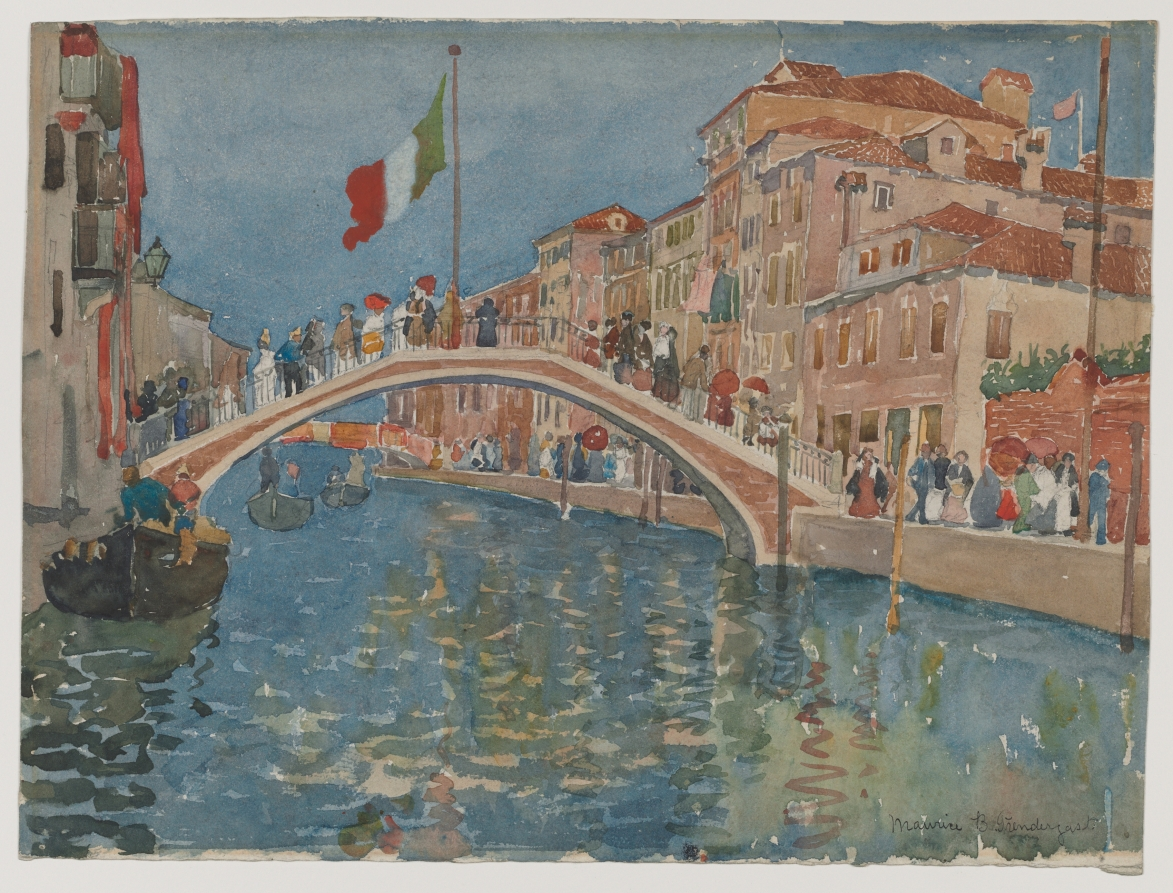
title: A Bridge in Venice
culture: America, late 19th Century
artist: Maurice Prendergast (American, born Newfoundland [now Canada], 1858–1924)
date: 1899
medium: watercolor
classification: Drawing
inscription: Signed lower right corner: Maurice B. Prendergast